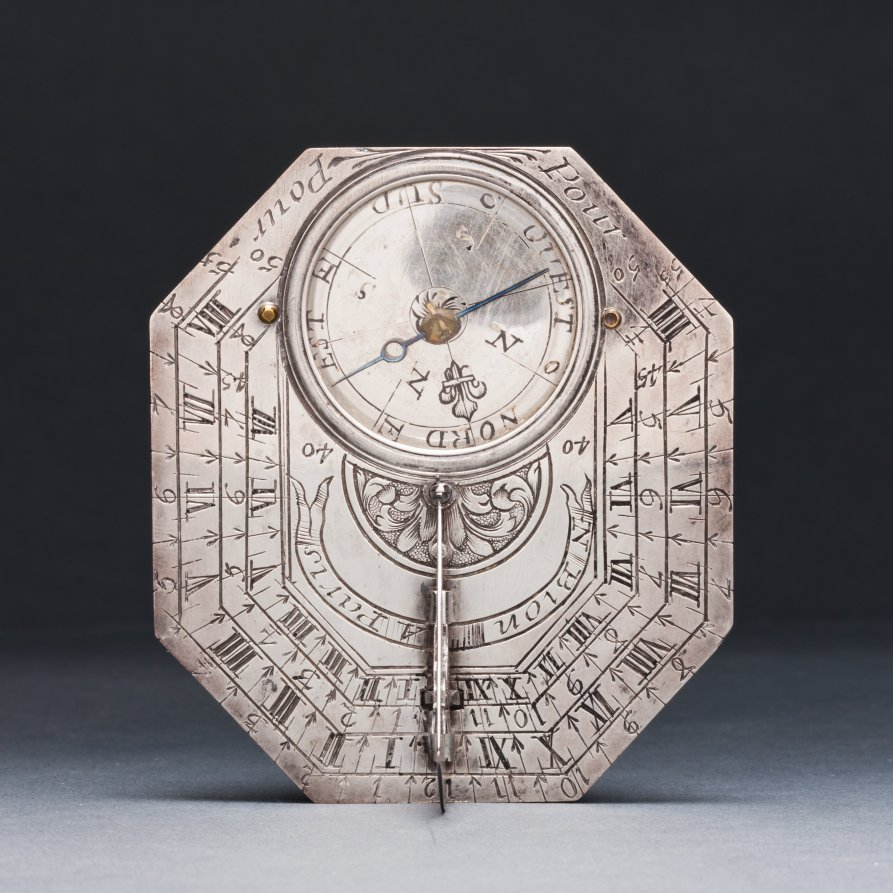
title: Butterfield Sundial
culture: France, 18th century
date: 1700s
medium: silver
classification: Silver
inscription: [Engraved signature above the compass in ribbon band]: "N. BION A Paris"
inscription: [Engraved on the face of the sundial]: “Pour 55° 4-5-6-7-8-9-10-11 50° IIII-V-VI-VII-VIII-IX-X-XI 45° 5-6-7-8-9-10-11 40° -VI-VII-VIII-IX-X-XI'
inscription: [Engraved on the other side]: "Pour 55° -8-7-6-5-4-3-2-1-0 50°-VIII-VII-VI-V-IIII-III-II-I 45°-8-7-6-5-4-3-2-1 40°-VII-VI-V-IIII-III-II-I"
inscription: [Engraved around the compass]: “NORD-OUEST-SUD-EST”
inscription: [Engraved on the back of the sundial]: “Turin 44 Milan 46 Paris 49 Lion 46 Metz 49 Rome 42 Liege 51 Naples 44 Namur 50 Gennes 44 Marseille 43 Grenoble 45 Bayonne 43 Bruxelle 51 Londres 52 Nantes 47 Vienne 48 Toulon 43 Tours 47 Lille 51”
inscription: [Engraved around the back of the compass]: “Venise 45 Strasbourg 49 Amsterdam 52 Hambourg 54 Varsovie 52 La Rochelle 46”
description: Butterfield-type sundials are characterized by their adjustable gnomons, metal flaps that cast a shadow on the dial’s face to indicate the hour, and geographical indices. This sundial has a scale adjustable between latitudes of 40° to 60° north. The latitudes of 26 European towns are engraved on its back for quick reference. With an intricately engraved silver face, it would have functioned as a fashionable traveler’s accessory.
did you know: Butterfield-style sundials were named after Micheal Butterfield, an English scientific and mathematical instrument maker who worked in Paris between 1674 and 1724.